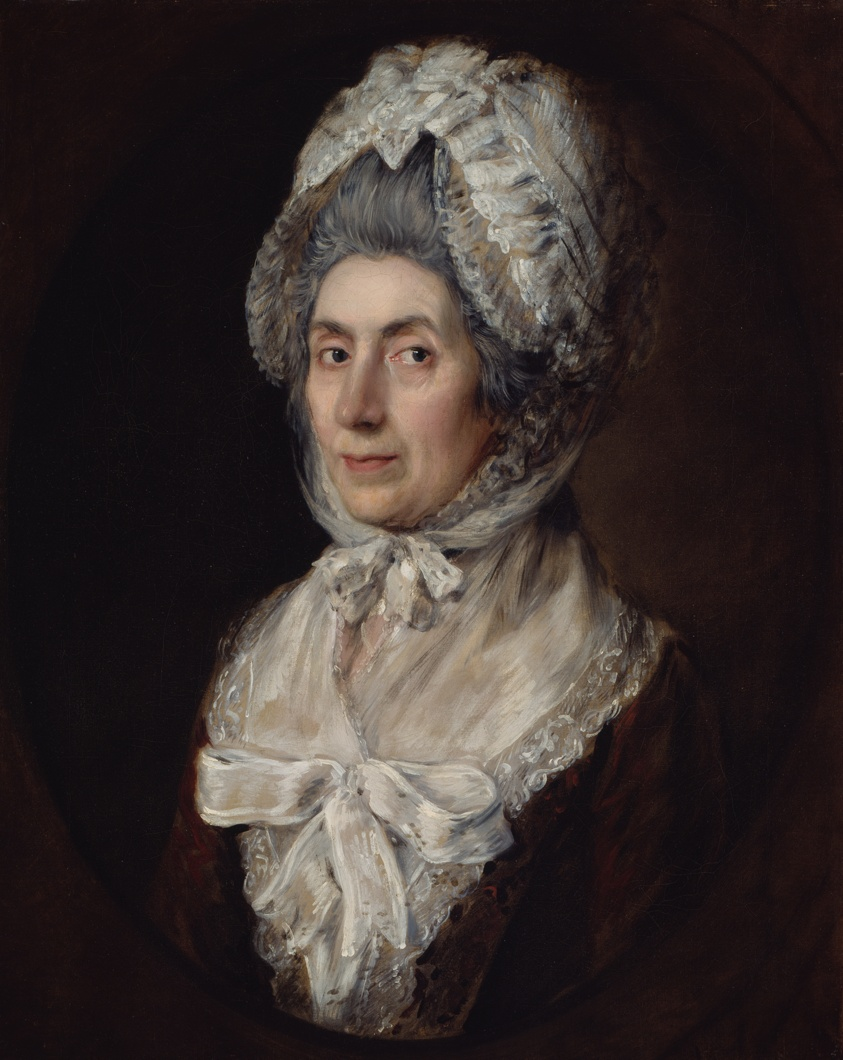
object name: Painting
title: Sarah Dupont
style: 18th Century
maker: Thomas Gainsborough (British, 1727–1788)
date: c. 1777–79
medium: Oil on canvas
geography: England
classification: oil on canvas; british; oil paintings (visual works); paint; portrait; painting; european painting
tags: portraits: female subject, white (color), black (color), bows, lace, headdresses, portraits, portrait, woman